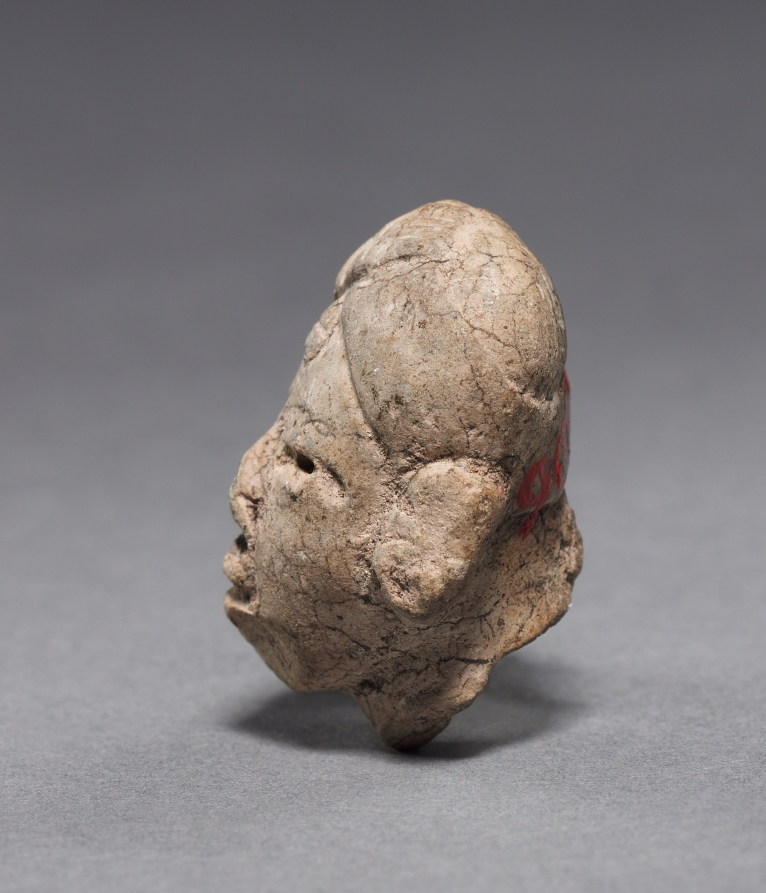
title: Figurine Head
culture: Mexico or Central America, Maya(?), Middle Preclassic period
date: c. 600–200 BCE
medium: pottery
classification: Sculpture